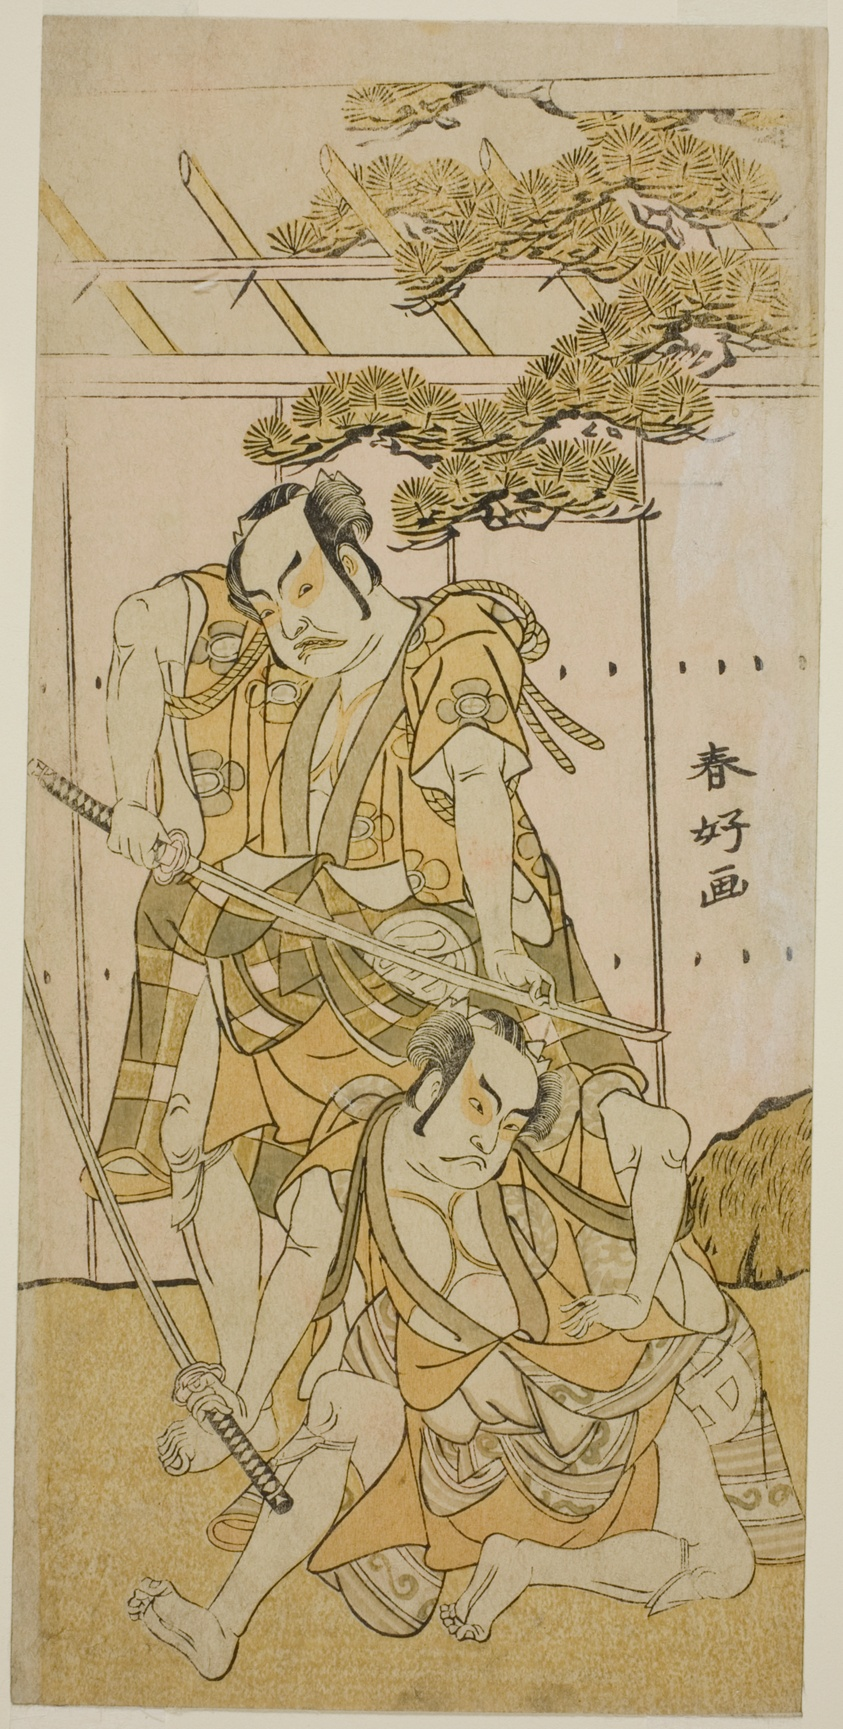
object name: Print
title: The Actors Otani Hiroji III as Onio Shinzaemon (right), and Nakamura Sukegoro II as Wappa no Kikuo (left) in the Play Iro Moyo Aoyagi Soga, Performed at the Nakamura Theater in the First Month, 1775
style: Japanese (culture or style)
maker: Katsukawa Shunko I; Japanese, 1743-1812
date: c. 1775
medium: Color woodblock print; hosoban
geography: Japan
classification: woodblock print; print; asian art